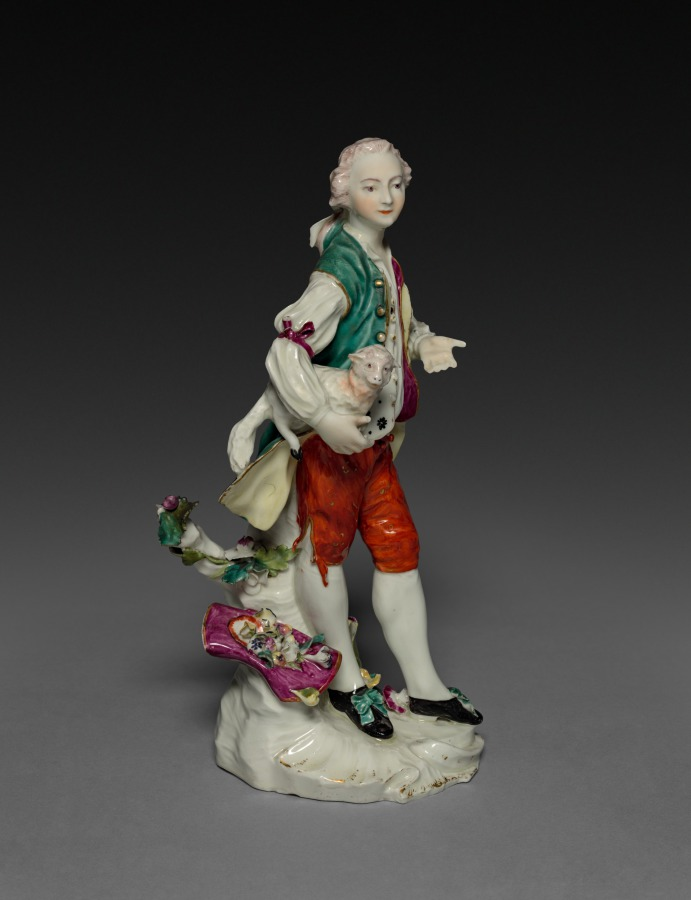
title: Farmer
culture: England, Derby, mid-18th century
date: 1760–1765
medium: soft-paste porcelain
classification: Ceramic